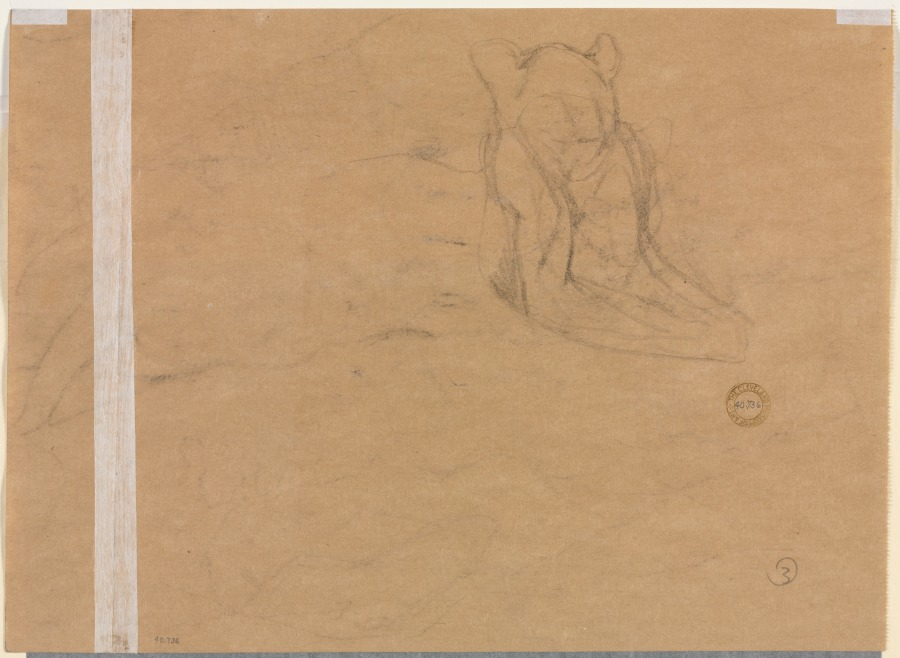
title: Tiger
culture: England, 19th-20th century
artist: John Macallan Swan (British, 1847–1910)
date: c. 1867–1910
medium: charcoal and chalk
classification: Drawing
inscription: In charcoal, recto, lower left: "J.M. Swan (signed)"